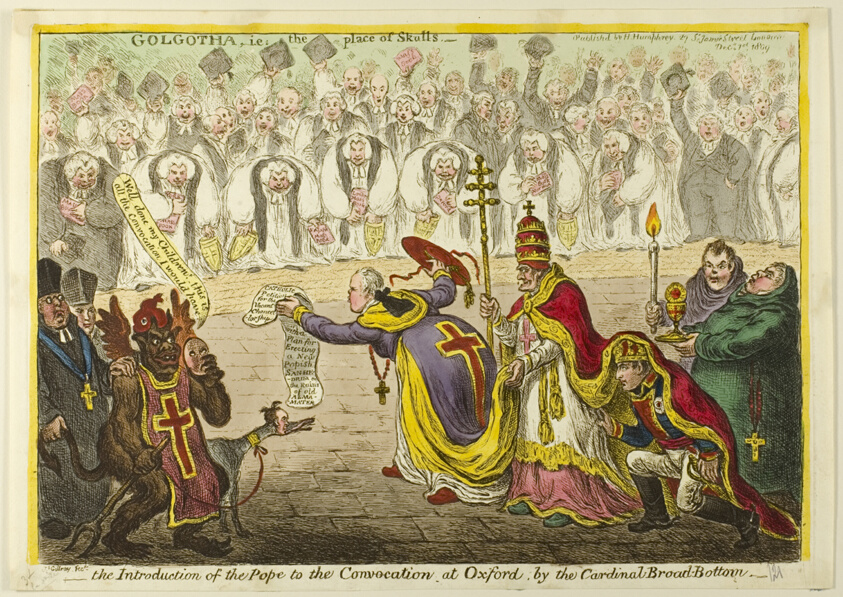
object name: Print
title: Introduction of the Pope to the Convocation at Oxford, by the Cardinal Broad-Bottom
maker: James Gillray (English, 1756-1815); published by Hannah Humphrey (English, c. 1745-1818)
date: published December 1, 1809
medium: Hand-colored etching on paper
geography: England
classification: etching; print; prints and drawing